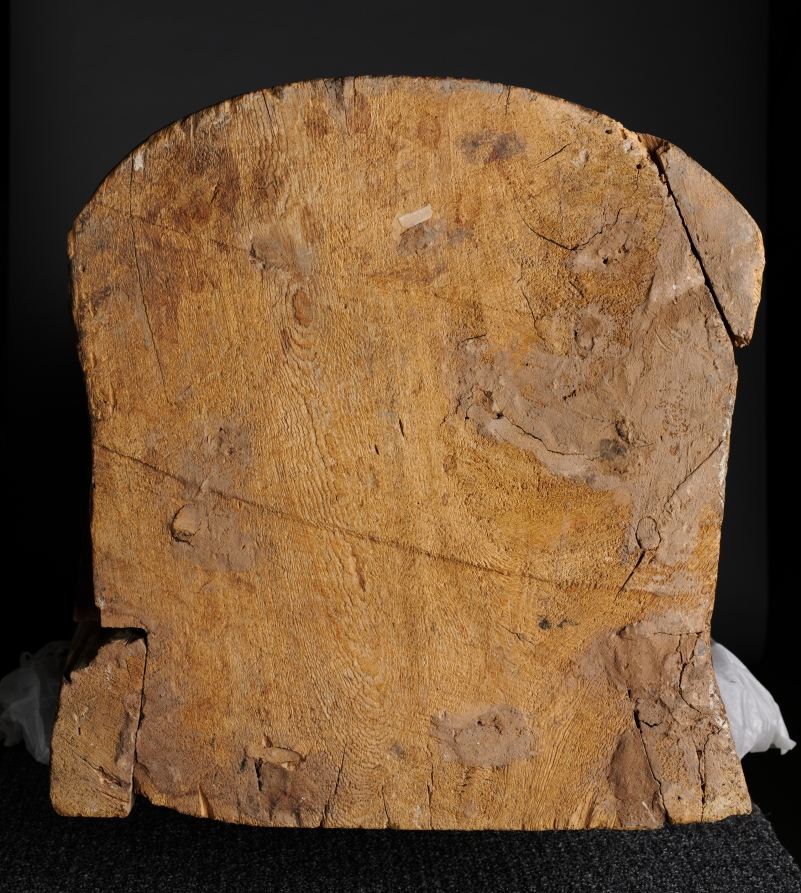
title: Coffin of Nesykhonsu (lid)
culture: Egypt, Third Intermediate (1069–715 BCE), Dynasties 21–22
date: c. 976–889 BCE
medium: gessoed and painted sycamore fig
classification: Funerary Equipment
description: A complete set of coffins during the late New Kingdom and Third Intermediate Period consisted of an outer and inner coffin and a mummy board (essentially a lid without a case, placed directly over the wrapped mummy). Judging by its size, this must have been Nesykhonsu's outer coffin. The type is essentially the same as the coffin of Bakenmut, which was also an outer coffin. The two coffins are said to have been found together and to have belonged to a man and wife. This is quite possible, although the inscriptions do not bear it out. Bakenmut is not mentioned on Nesykhonsu's coffin, nor is she mentioned on his. There was by this time a tremendous repertoire of scenes appropriate for coffin decoration. Whereas Bakenmut's coffin features images of deified dead pharaohs, Nesykhonsu's is decorated in a more personal way with scenes from her own funeral. The main scene in the interior (near the top) shows a priest clad in a panther skin with the mummy of Nesykhonsu behind. The god appears in mummy form and wears a sun disk on his head. The scarab beetle inside the sun disk identifies him as Khepri, the morning sun, and the hieroglyphs to the right identify him as Atum, the evening sun. Taken together, image and text represent the sun god in both his rising and setting, youthful and aged aspects.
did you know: Two of Nesykhonsu's titles, "Lady of the House" and "Singer of the Choir of Mut the Great," are written on the outside of the coffin.